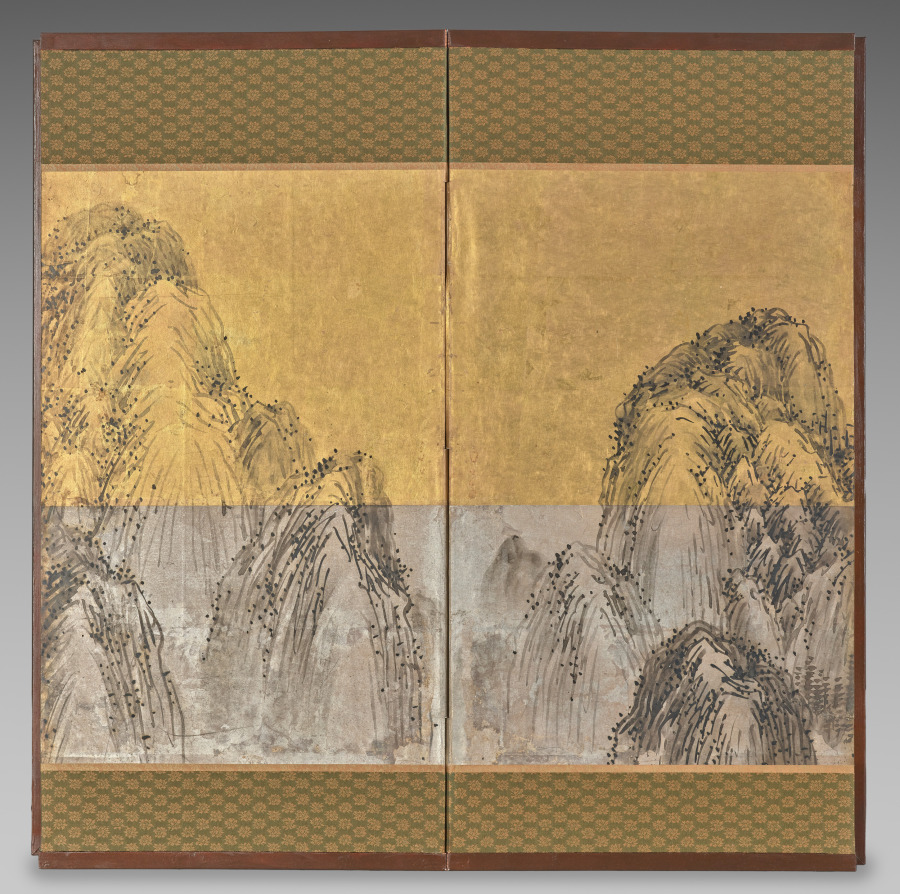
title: Seventy-Two Peaks Under the Blue Sky with Mount Furong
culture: Japan, Edo period (1615–1868)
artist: Matsumura Goshun (Japanese, 1752–1811)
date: 1785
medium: Eight-panel folding screen; ink with gold and silver foil on paper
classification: Painting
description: The low height of this folding screen suggests its use as a partition in a small tearoom. An inscription identifies the scene as the 72-peak Heng mountain range in Hunan, China, associated with Buddhist and Daoist traditions and celebrated in poetry. Special mention in the inscription is made of Mount Furong, one of the peaks in the range. Matsumura Goshun may have drawn inspiration from his teacher, Yosa Buson (与謝蕪村) (1716–1783), whose final work depicted the same mountain range.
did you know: By painting on silver and gold foil, Matsumura Goshun created an alluring surface and deep space in this surprisingly spare vista.